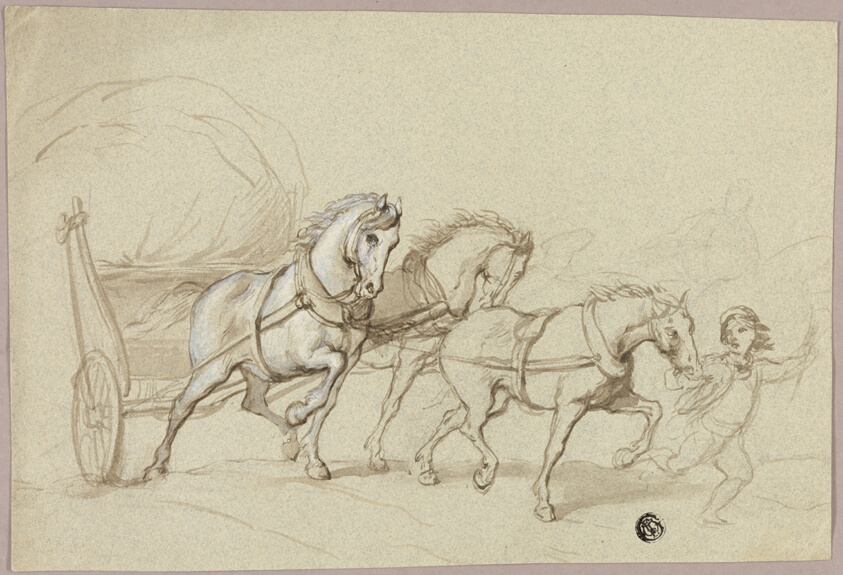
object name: Drawing and Watercolor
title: Child Leading Three Horses and Wagon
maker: Attributed to Thomas Stothard (English, 1755-1834); or possibly Frank Walter Taylor (American, 1874-1921)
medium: Brush and brown ink, heightened with blue and white gouache, on green wove paper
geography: England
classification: brush and wash; pen and ink drawings; drawings (visual works); prints and drawing